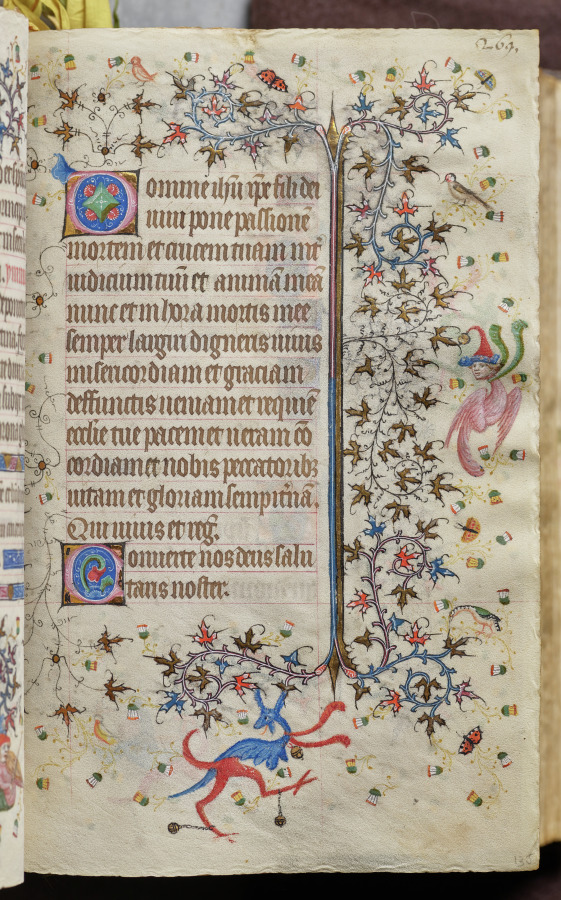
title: Hours of Charles the Noble, King of Navarre (1361-1425): fol. 135r, Text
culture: France, Paris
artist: Master of the Brussels Initials and Associates (French)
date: c. 1405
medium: ink, tempera, and gold on vellum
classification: Bound Volume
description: This precious volume was obviously highly prized by its owner, the French-born King of Navarre, who had his coat of arms painted on no less than twenty folios. Rather than directly commissioning this manuscript from a specific workshop, it seems that Charles the Noble acquired his book of hours -- perhaps ready-made for the luxury market -- while on a trip to Paris in 1404-05. A collaborative effort, six painting styles are evidenced within the pages of this codex, those of two Italians, two Frenchmen, and two Netherlanders. The painter who was responsible for the planning and decoration of the book, and who produced seventeen of the large miniatures, was a Bolognese artist known as the Master of the Brussels Initials. His principal assistant, responsible for most of the borders, was a Florentine who signed his name "Zecho" da Firenze on folio 208 verso.